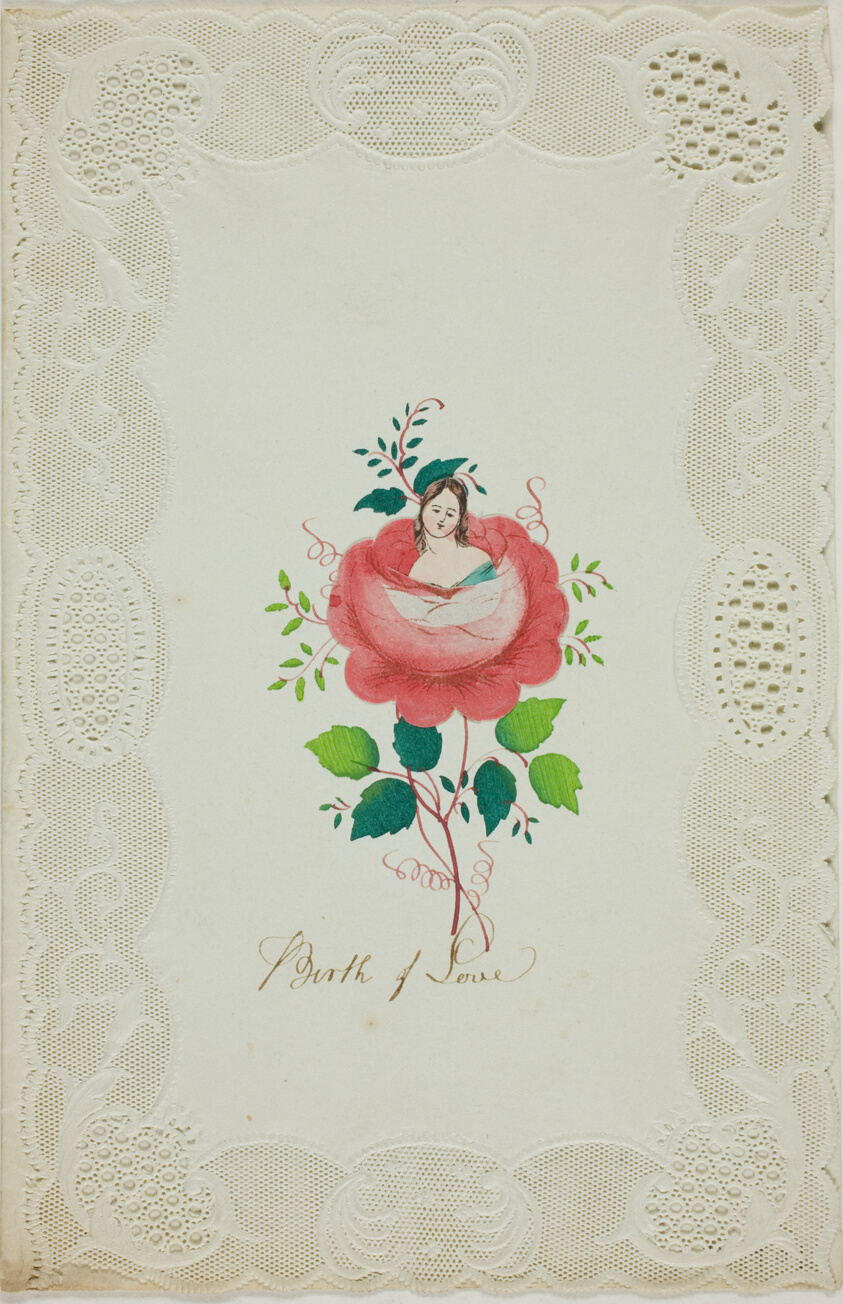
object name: Drawing and Watercolor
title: Birth of Love (Valentine)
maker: Unknown Artist; English, 19th century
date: c. 1850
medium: Watercolor and collaged elements, with pen and black ink on cut and embossed ivory wove paper (lace)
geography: England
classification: valentine; prints and drawing; paper